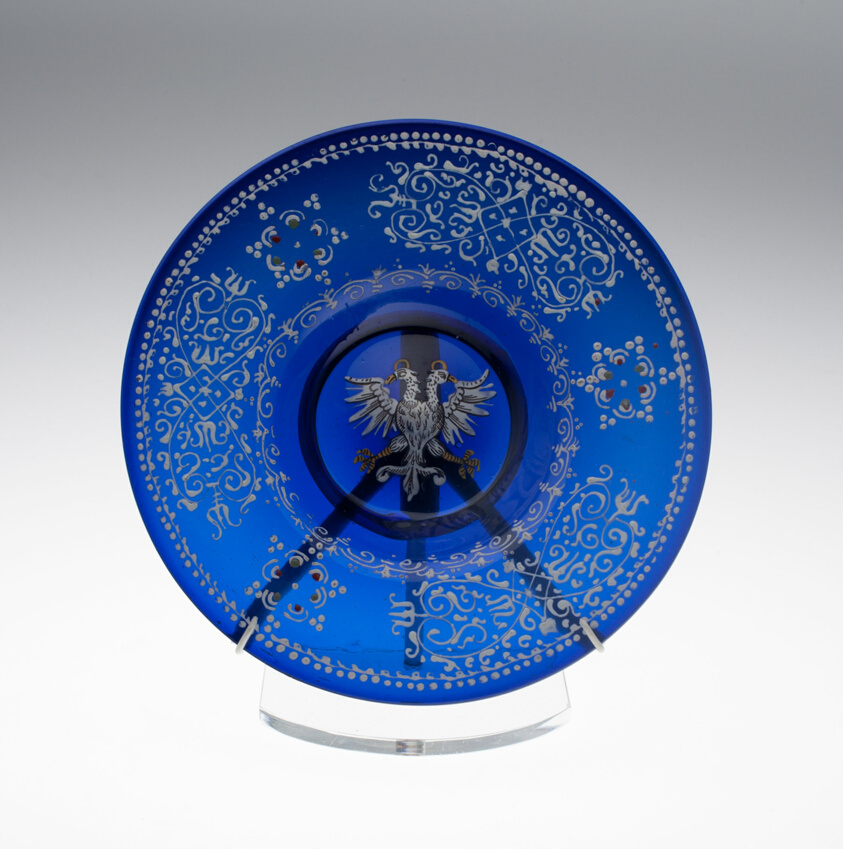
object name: Glass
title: Plate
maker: Bohemia, Czech Republic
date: Early 17th century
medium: Blue glass with enamel decoration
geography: Bohemia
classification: plate (general, dish); glass; dish (vessel); european decorative arts